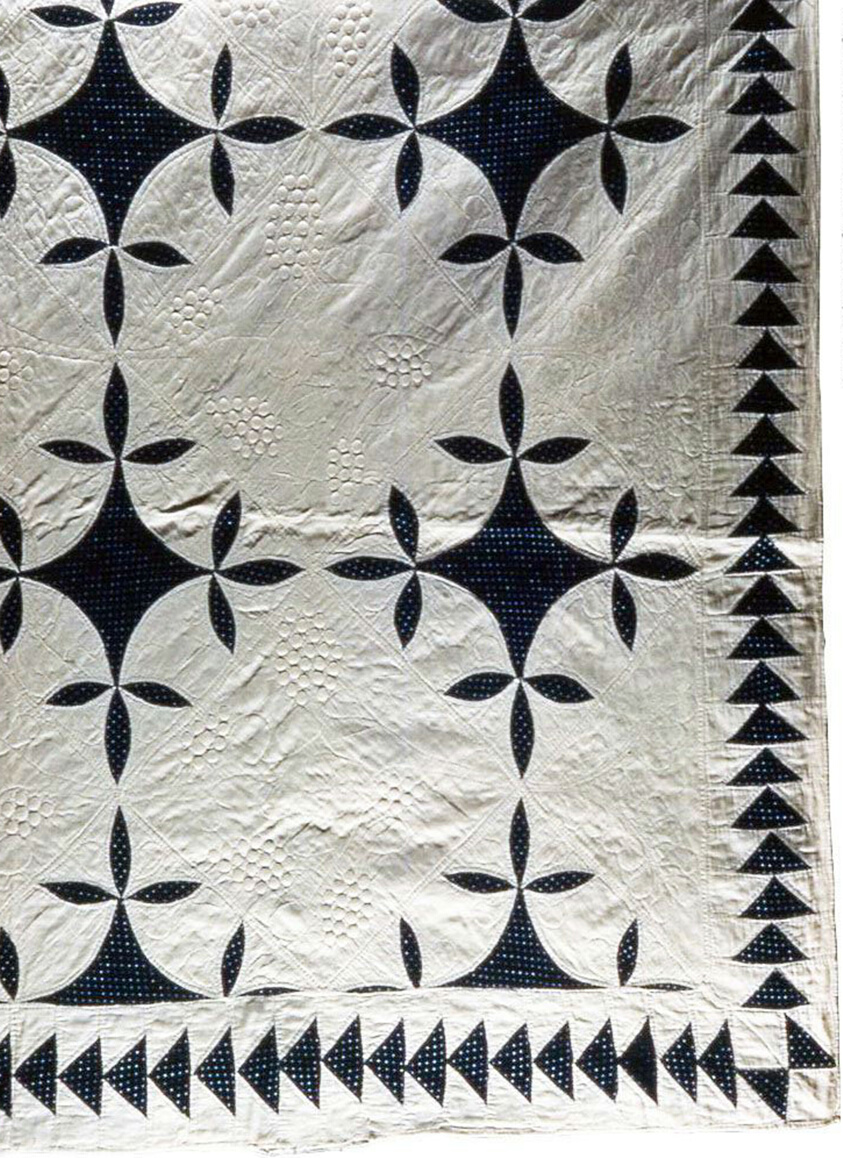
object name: Textile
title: Bedcover (Pincushion and Burrs or Square and Swallows Quilt)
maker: United States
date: c. 1830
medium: Cotton, plain weave, in parts (block?) printed; pieced; backed with cotton, plain weave; quilted and stitched in trapunto technique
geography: United States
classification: textile; needlework - quilt